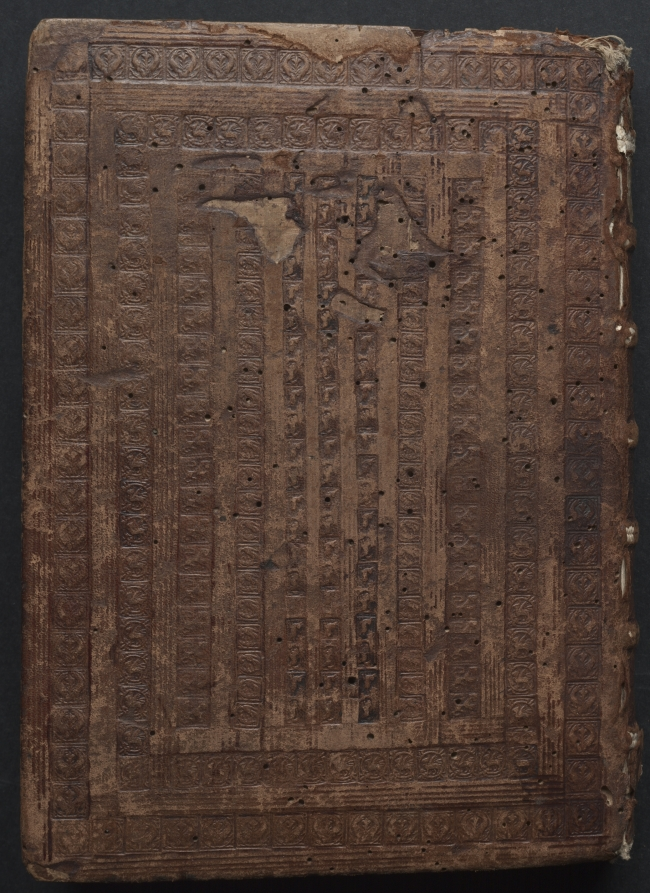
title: The Gotha Missal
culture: France, Paris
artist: Master of the Boqueteaux (French)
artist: and Workshop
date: c. 1375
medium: ink, tempera, and gold on vellum; blind-tooled leather binding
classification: Bound Volume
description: The style and quality of this manuscript's decoration is typical of deluxe Parisian books made for aristocratic or royal patrons. Most of the book's decoration appears to be the work of the Master of the Boqueteaux, an artist active at the court of King Charles V (died 1380). His style was apparently shared by a number of book illuminators working in and around Paris. It is very possible that the Gotha Missal belonged to Charles V, but is not provable because the manuscript has no royal portraits and lacks a colophon. Given the book's magnificent decoration, however, it would seem that it was produced for a Valois prince, if not for the king himself. The manuscript receives its name from the German dukes of Gotha, its later owners.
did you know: The artist received his name because of his tendency to draw trees that resembled little mushrooms.